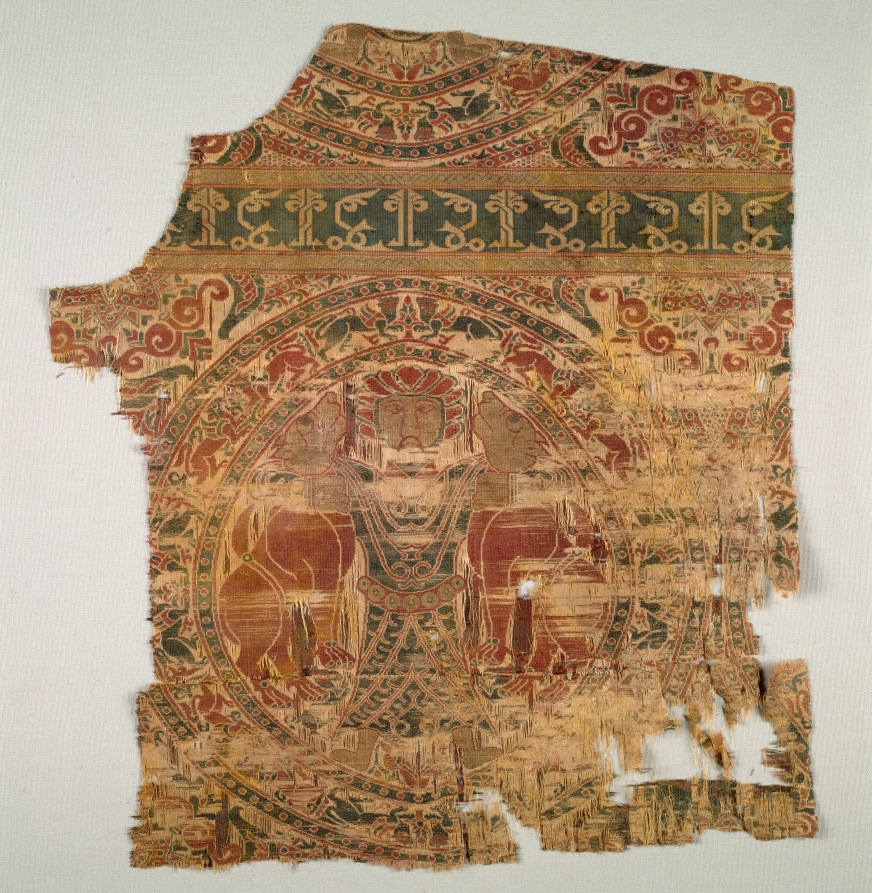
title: Fragment with Lion Strangler from a Dalmatic of Saint Bernard Calvo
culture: Spain, Almeria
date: 1200–1243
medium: Silk and gold thread: lampas, taqueté, and plain-weave variant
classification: Textile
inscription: the inscription (incorrectly written) appears to read "al-'amir" (command, i.e. authority) [alternately retrograde and vice versa].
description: Within the elaborate roundel, a bearded man with a belted tunic strangles a lion in each hand. Gold thread shimmers on their heads and his hands. In the inscription band across the top, an Arabic word has been written with mirror-image symmetry. It can be read as al-yumn, primarily translated as prosperity. The central motif of this renowned silk is a pre- Islamic Persian symbol of royal power. Both Muslims and Christians throughout the Iberian Peninsula admired such textiles. Members of the Catholic clergy incorporated it into a dalmatic—a long ceremonial tunic. It was found in the late 1800s in the tomb of Saint Bernard Calvo, Bishop of Vich (1180–1243).